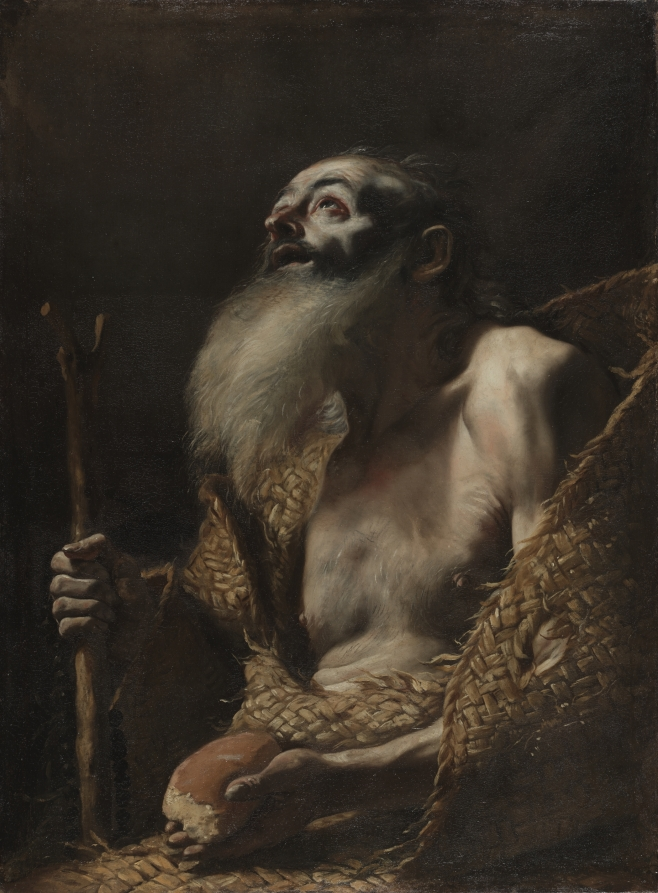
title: Saint Paul the Hermit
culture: Italy, 17th century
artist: Mattia Preti (Italian, 1613–1699)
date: c. 1662–1664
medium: oil on canvas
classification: Painting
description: After training in Rome in the 1630s and 1640s, Preti went to Naples where he continued working in a mode inspired by the work of Caravaggio. In this painting, dramatic lighting and intense naturalism depict the intersection of the heavenly and earthly realms. According to Catholic tradition, Saint Paul the Hermit fled into the desert to escape persecution from the Romans in the third century, and is revered as the first of many hermit saints. A raven brought Saint Paul a half a loaf of bread daily, which enabled him to survive to the age of 113 years. Preti depicted the saint looking heavenward in appreciation and awe of his heavenly provider.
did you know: Clothed only in a rough woven cloth, Paul's suffering drew him spiritually closer to Christ.